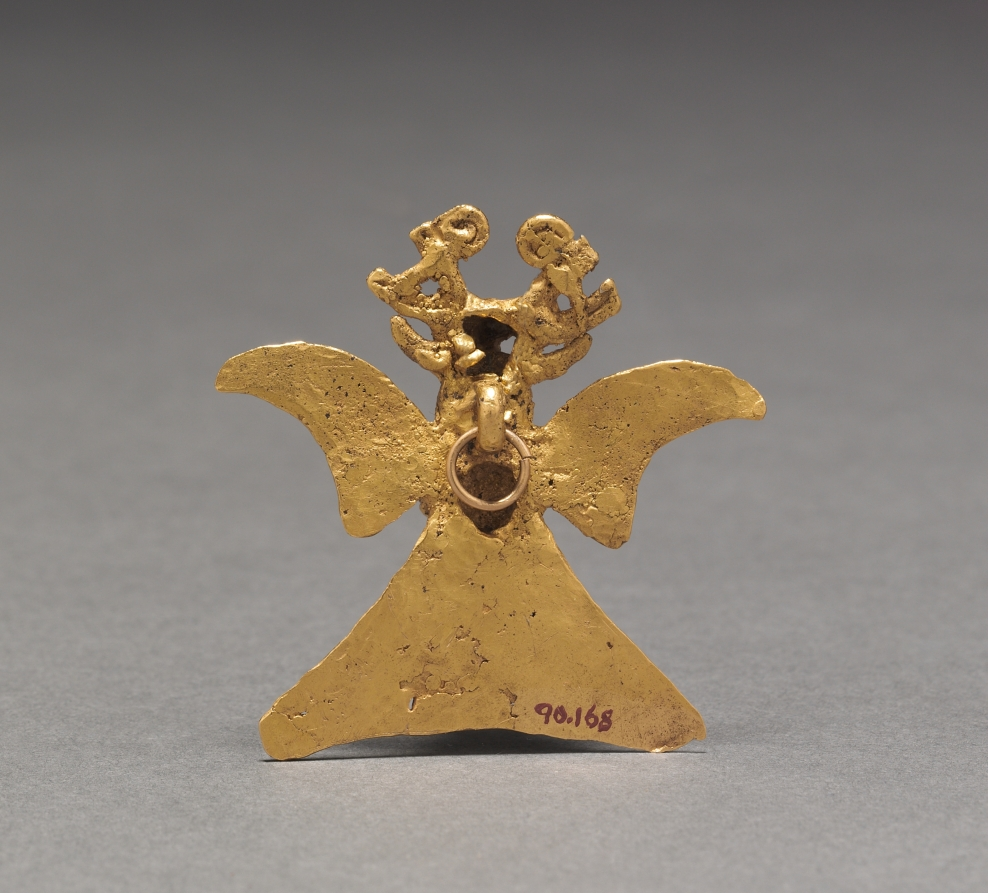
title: Bird Pendant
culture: Panama, Veraguas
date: 1000–1500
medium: cast and hammered gold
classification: Metalwork